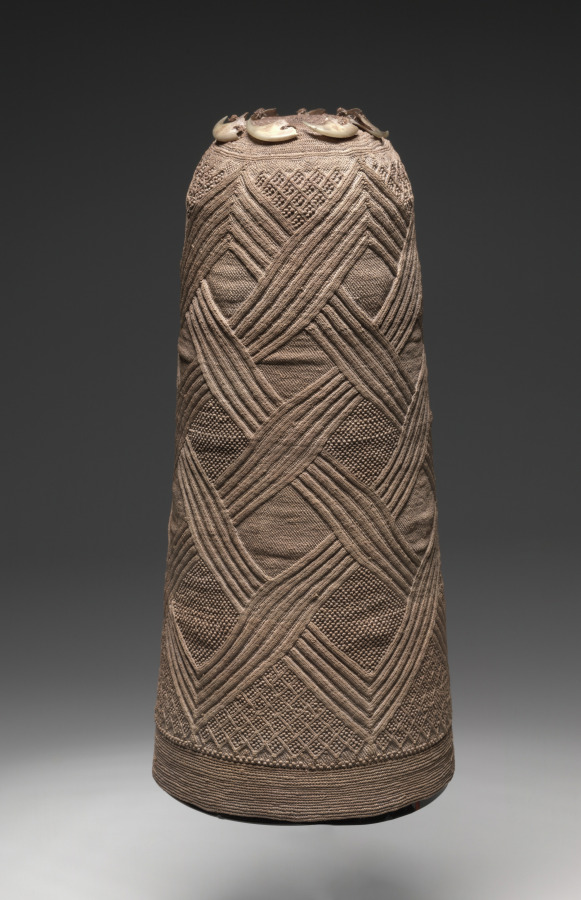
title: Prestige Cap (mpu ngola)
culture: Africa, Central Africa, Democratic Republic of Congo, Republic of Congo, or Cabinda (Angola), Kongo-style maker, possibly Yombe subgroup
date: late 1800s–early 1900s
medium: Raffia palm fiber (Raphia ruffia or R. vinifera) and leopard claws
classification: Garment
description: Zimpu (singular: mpu) are intricately knotted caps worn by men in parts of Central Africa. Ringed with leopard claws, this long cap (mpu ngola) once belonged to a high-status man; the fierce feline attachments alluded to his personal qualities, as both were seen as leaders in their domains. Its interlacing motifs appear across artforms made by the Kongo, Vili, and Yombe peoples. When new, caps draped over the head. However, raffia fibers stiffen over time. To support this now-delicate ngola, the CMA’s conservators mounted it upright. Known since at least 1607 in the former Loango Kingdom, as well as the adjacent Kongo Kingdom, such caps were once made by noblemen and worn into at least the 1980s.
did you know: The geometric motifs on this mpu cap—including diamonds and interlaces—are seen on Kongo, Vili, and Yombe works in other materials, including ivory and basketry.